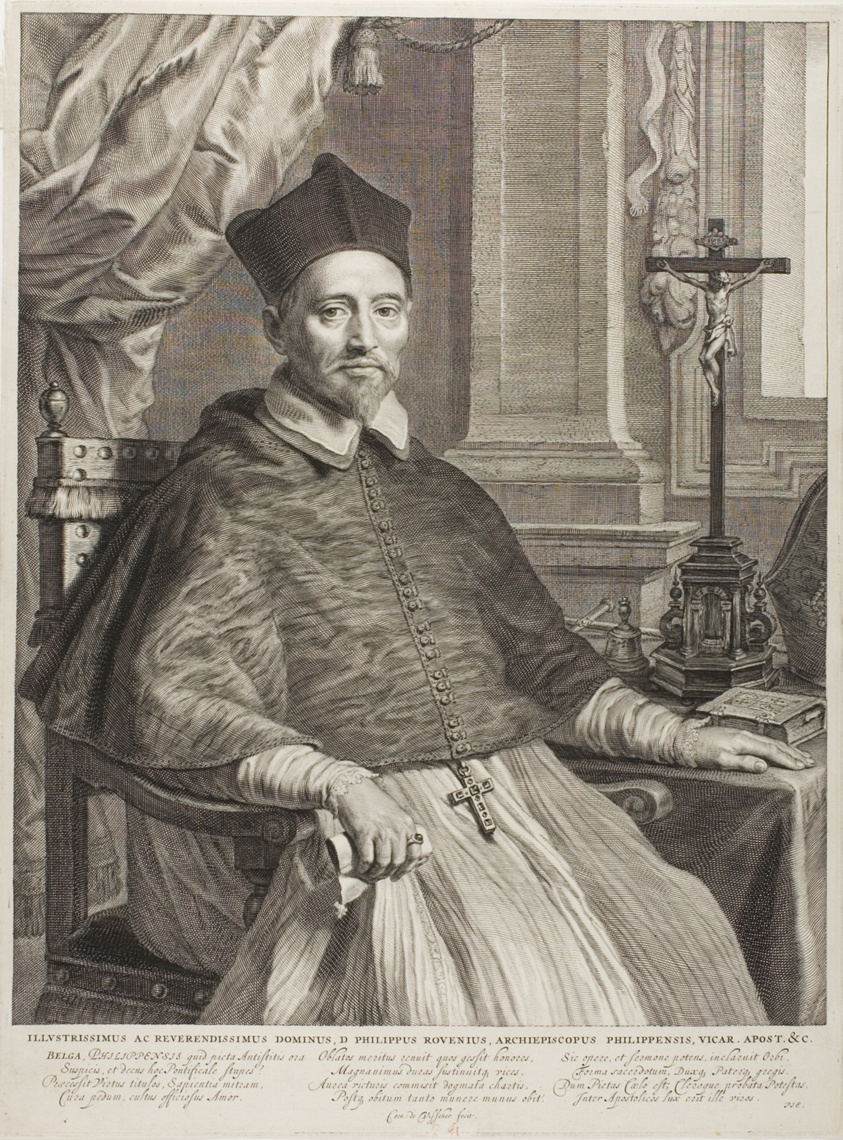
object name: Print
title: Philip Roveen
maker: Cornelis Visscher (Dutch, c. 1629-1658)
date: c. 1650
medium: Etching and engraving on paper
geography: Holland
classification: engraving; print; prints and drawing